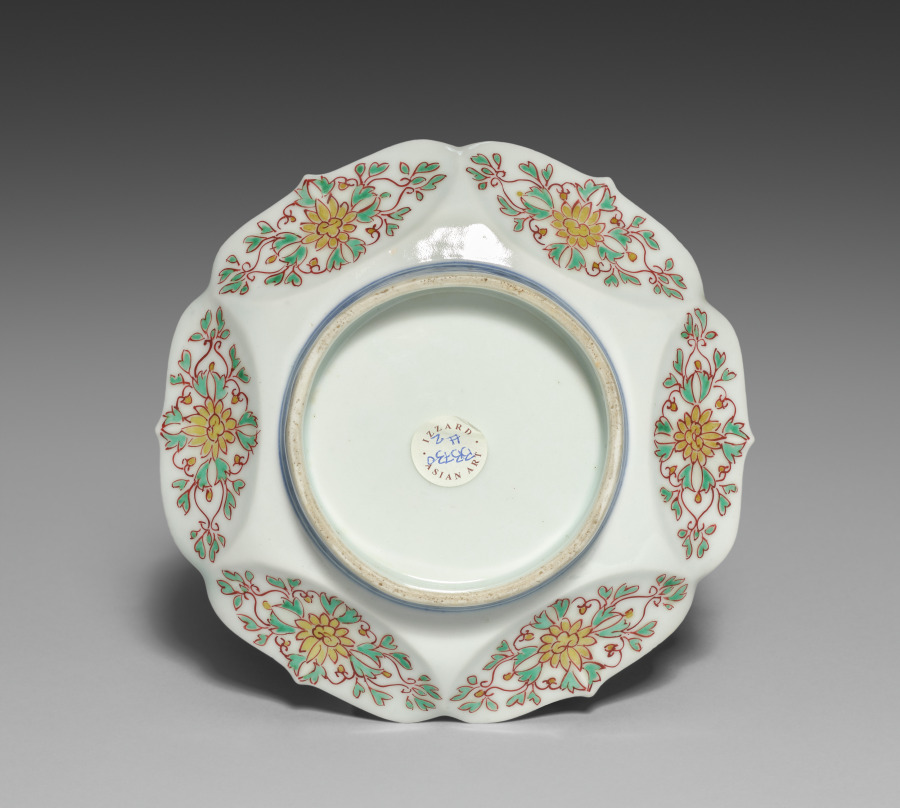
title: Small Dish (Kozara) with Hemp-Leaf Pattern and Bellflower Rim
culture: Japan, Edo period (1615–1868)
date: c. 1670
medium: Porcelain with underglaze blue and color enamel (Hizen ware, Nabeshima type)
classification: Ceramic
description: This dish combines underglaze blue decoration with overglaze color enamels. In between is a transparent glaze.